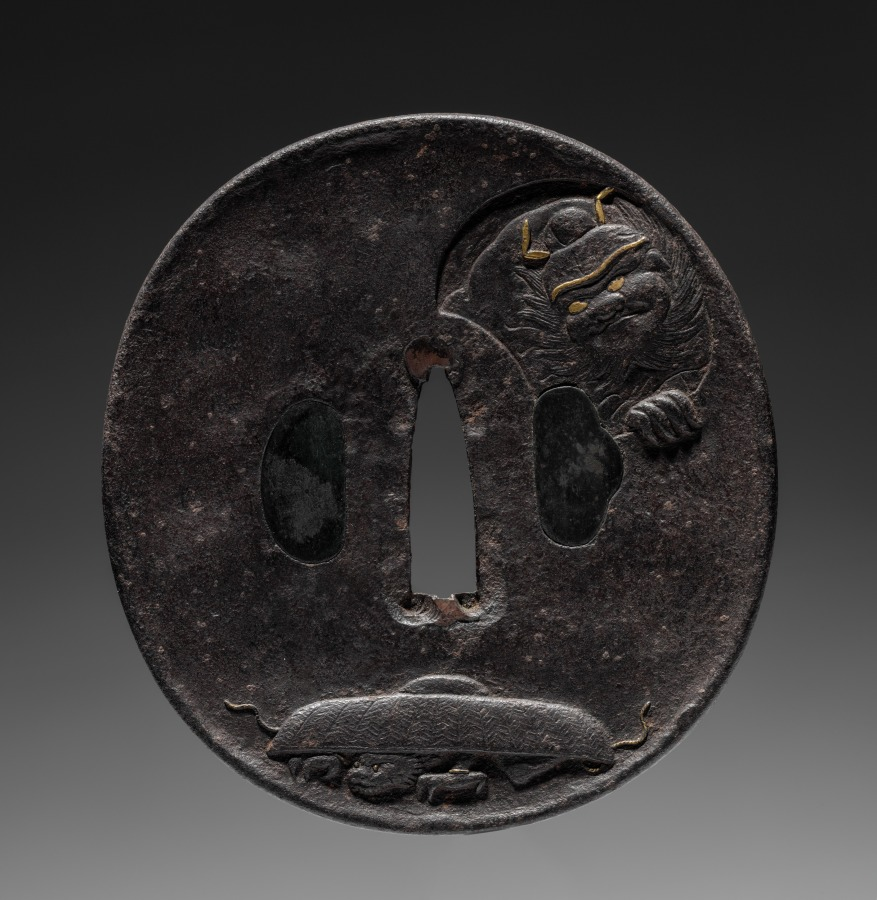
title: Sword Guard (Tsuba) with Zhong Kui (Shoki) the Demon Queller and Pine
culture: Japan, Edo period (1615–1868)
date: 1615–1868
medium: iron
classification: Arms and Armor